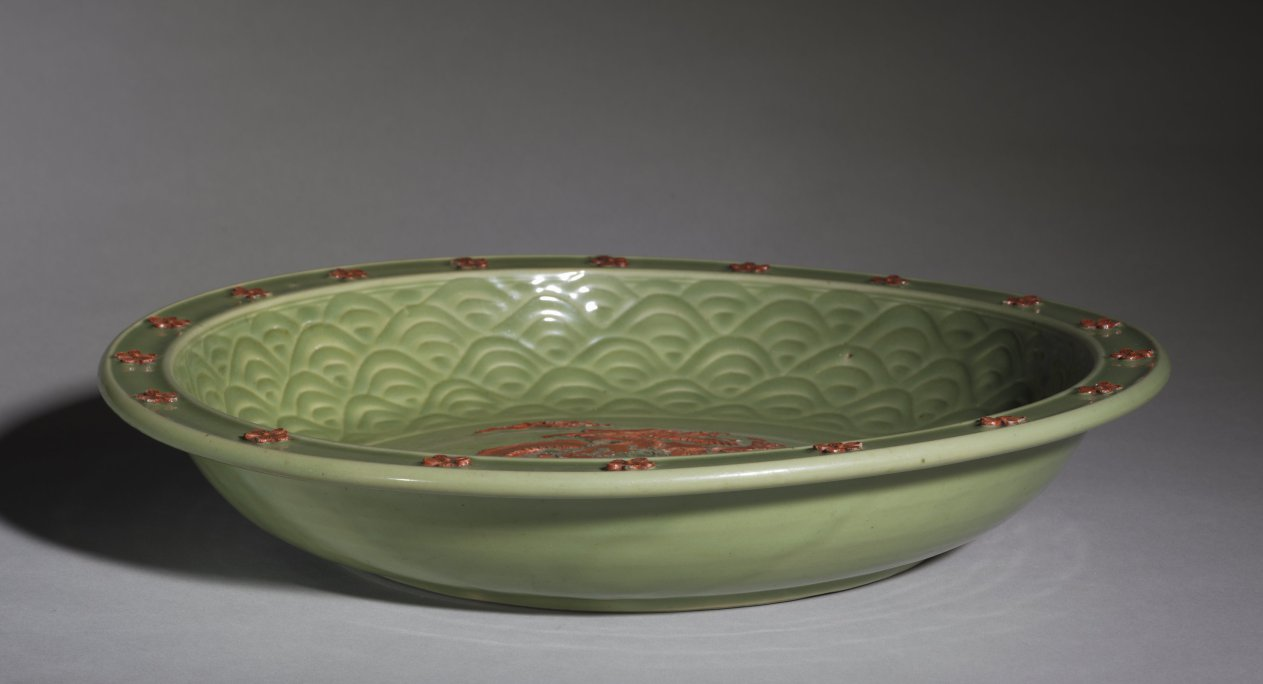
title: Plate with Relief Dragon among Clouds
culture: China, Zhejiang province, Longquan region, Yuan dynasty (1271-1368)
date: 1300s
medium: porcelaneous stoneware with celadon glaze and molded decoration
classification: Ceramic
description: In the center of this plate a majestic coiled dragon is surrounded by clouds, a wave pattern, and five-petaled rosettes around the rim. In front of the dragon's mouth is a flaming pearl, a symbol often associated with dragons from this time. The plate achieves distinctive visual contrasts with green glaze and brown, and its main decorative motifs are raised.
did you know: In front of the dragon's mouth is a flaming pearl, a symbol often associated with dragons from this time.